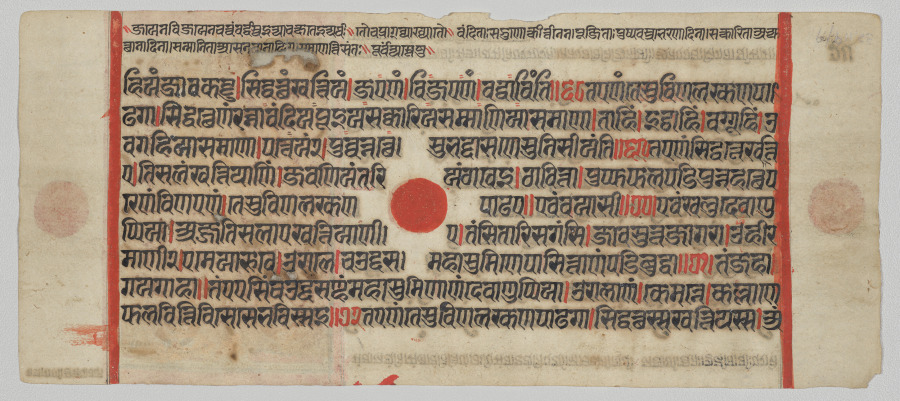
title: Text, Folio 25 (recto), from a Kalpa-sutra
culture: Western India, Gujarat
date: c. 1475–1500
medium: Gum tempera, ink, and gold on paper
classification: Painting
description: The king and queen seated in the upper register are the parents of Mahavira, founder of the Jain religion. The two bearded figures in the lower register are the learned men versed in the interpretation of dreams. One writes with a pen; the other consults a scroll. They predict that the auspicious dreams of the queen foretell the birth of a son who will either be a powerful hero and king or a religious leader of the world.